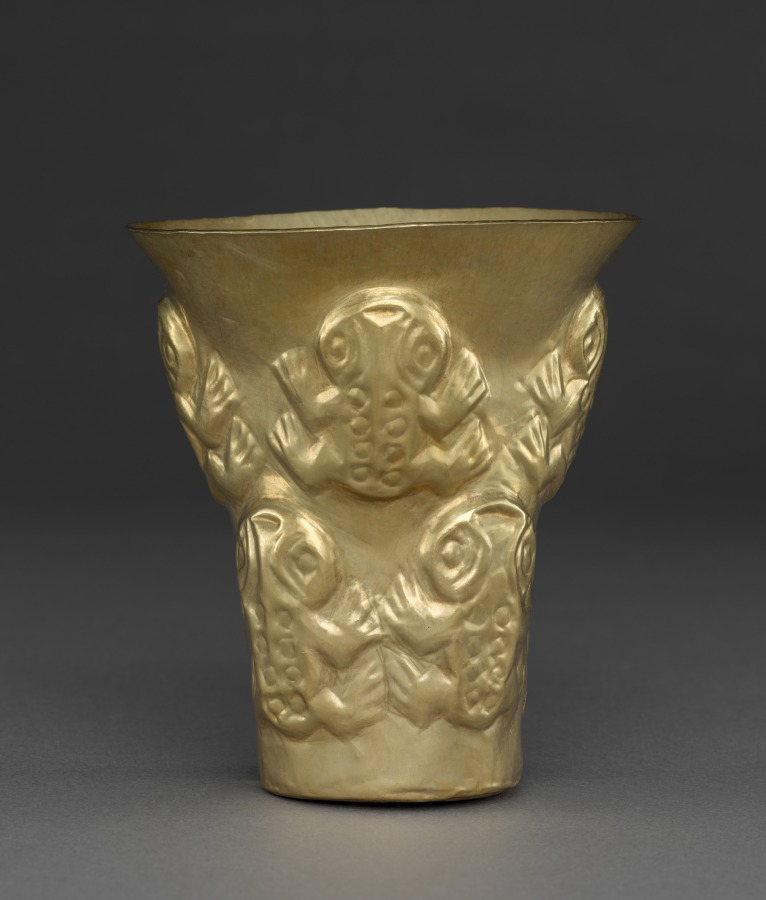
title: Beaker with Frogs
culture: Central Andes (Peru), Lambayeque (Sicán) people, 10th century-12th century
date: 900–1100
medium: gold, hammered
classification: Metalwork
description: This beaker was created by an artist of the Lambayeque culture of Peru's north coast. High-relief frogs grace the surface, which has a dramatically flaring rim as well as a silvery color, the result of silver in the alloy. If such beakers were used in life—that is, not created exclusively for the lavish tombs in which they have been found in quantities—they may have figured in feasting events that were central to late pre-Hispanic political, social, and religious life.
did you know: This beaker was probably formed using a single sheet of metal over a wooden form.